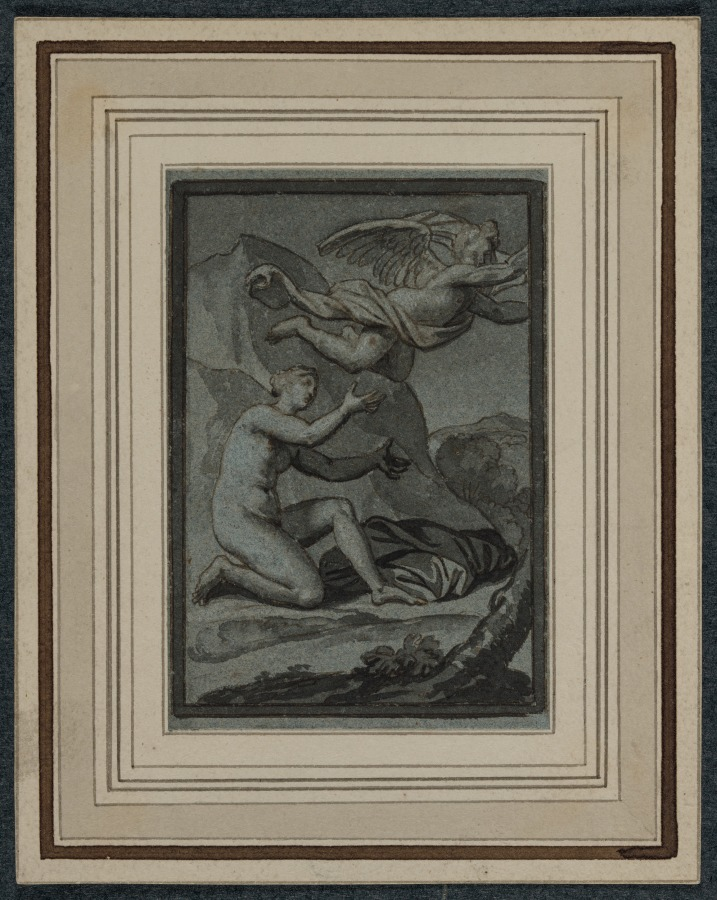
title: Mythological Scene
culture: France, 17th century (?)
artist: Louis Cheron (French, 1660–1713)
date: 1600s?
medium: pen and brown ink and brush and gray wash; framing lines in brown ink and gray wash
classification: Drawing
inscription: VERSO, upper left, in graphite: [illegible]02 . 6 ; down center, in graphite, across entire sheet: Dessin de Prudhon / donn[a?] par / Le 1_6_36 / collection / Crozat et Br[illegible]